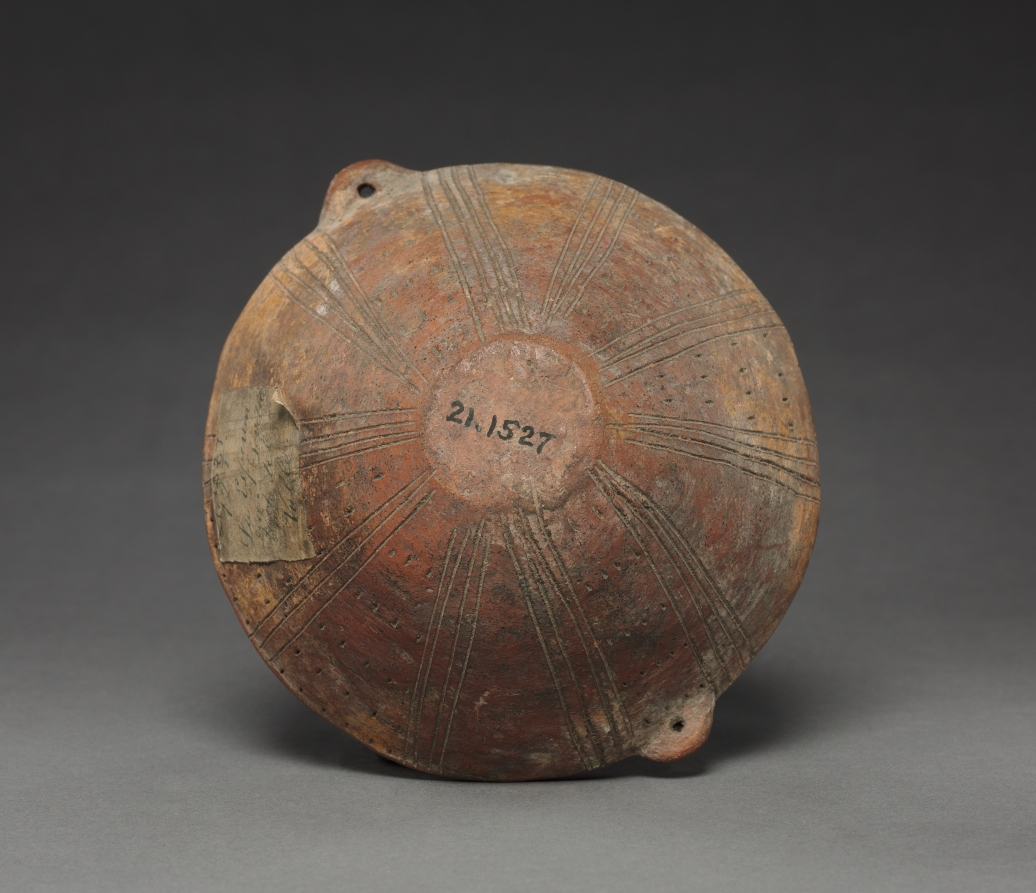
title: Dish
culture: Colombia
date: before 1550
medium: red ware with incised patterns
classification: Ceramic